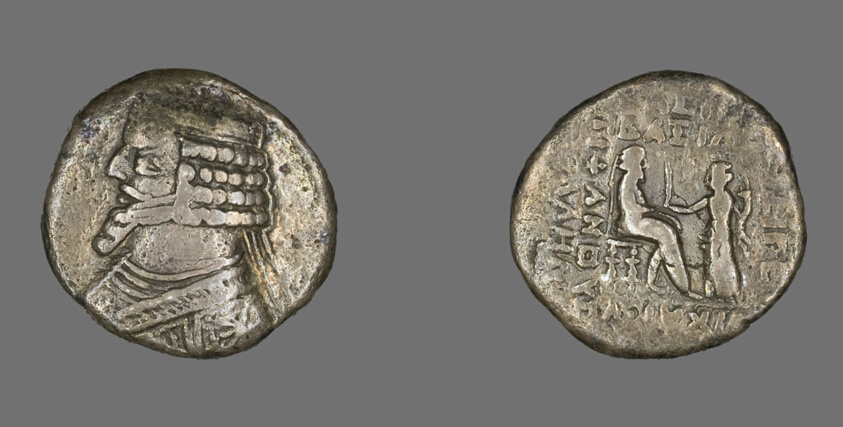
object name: Coin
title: Tetradrachm (Coin) Portraying King Phraates IV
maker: Parthian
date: 38-3 BCE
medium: Silver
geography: Iran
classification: coin; ancient art